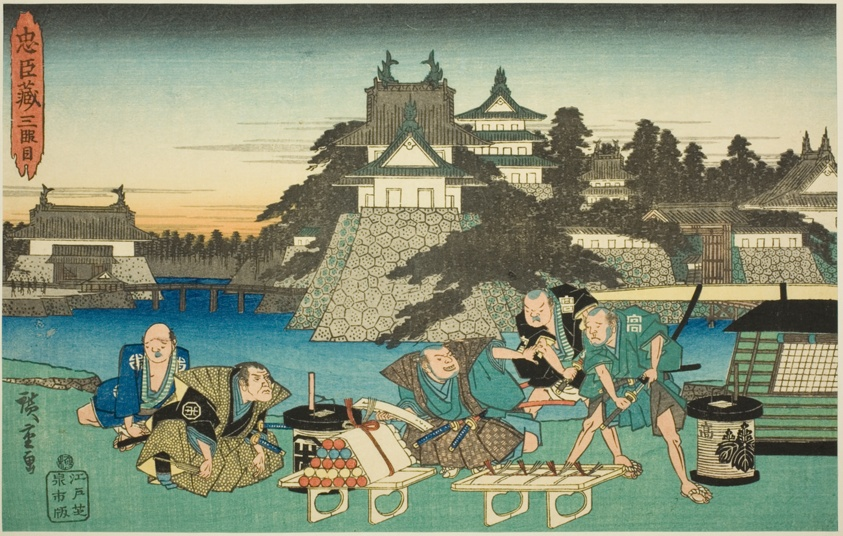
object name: Print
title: Act 3 (Sandanme), from the series "The Revenge of the Loyal Retainers (Chushingura)"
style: Japanese (culture or style)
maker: Utagawa Hiroshige 歌川 広重; Japanese, 1797-1858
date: c. 1834/39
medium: Color woodblock print; oban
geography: Japan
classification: woodblock print; print; asian art